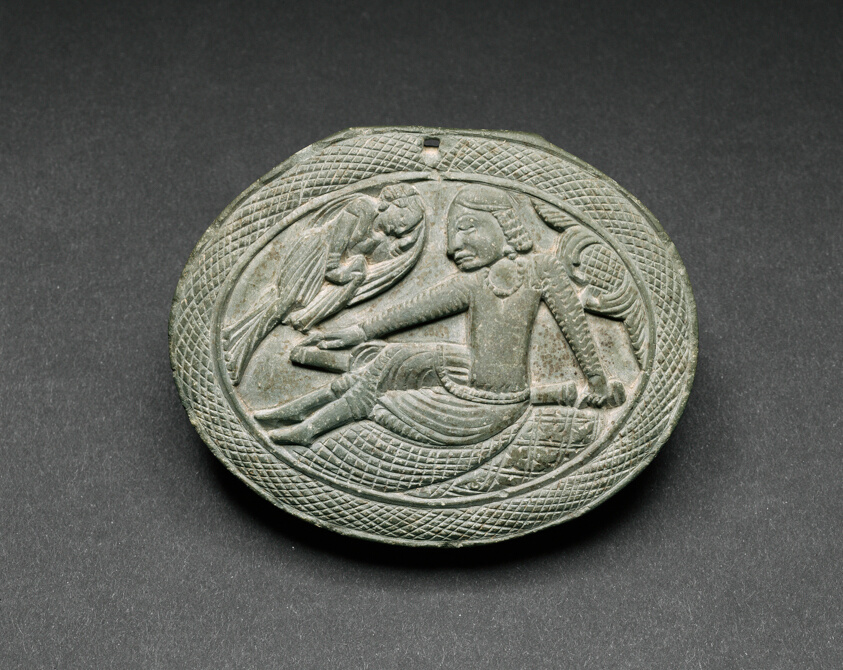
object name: Decorative Arts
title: Oval Cosmetic Box Lid with a Man Being Entertained by a Lyrist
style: South Asian, gandharan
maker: Pakistan; Ancient region of Gandhara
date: 5th/6th century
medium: Gray schist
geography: Gandhara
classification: container for personal use; box; stone (unidentified); stone; sculpture; asian art; decorative arts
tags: music, musicians